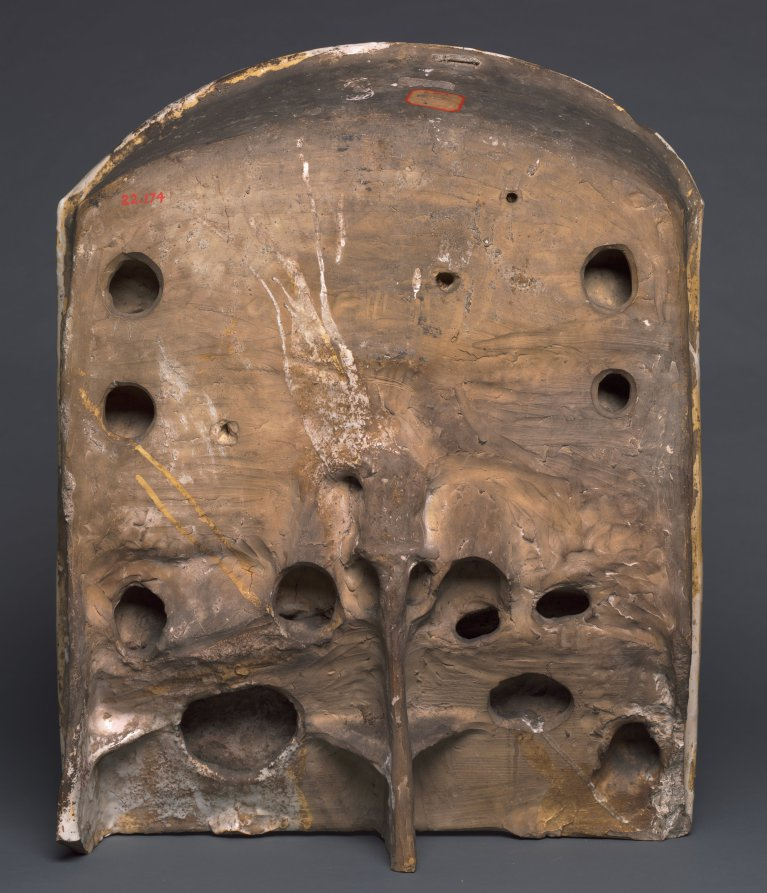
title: The Entombment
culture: Italy, Faenza, 15th century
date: late 1400s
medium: glazed terracotta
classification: Ceramic